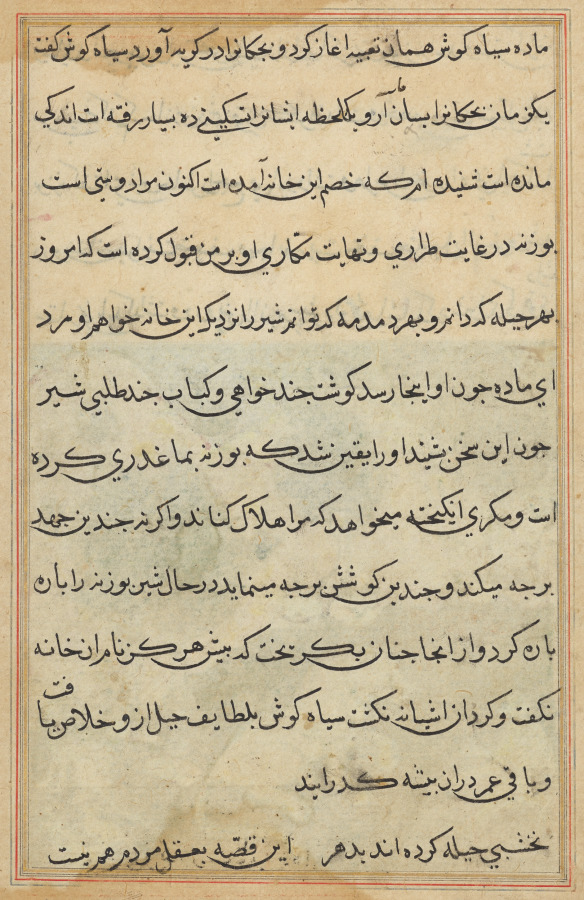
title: Tuti-Nama (Tales of a Parrot)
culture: Mughal India, court of Akbar (reigned 1556–1605)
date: c. 1560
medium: gum tempera, ink, and gold on paper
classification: Painting